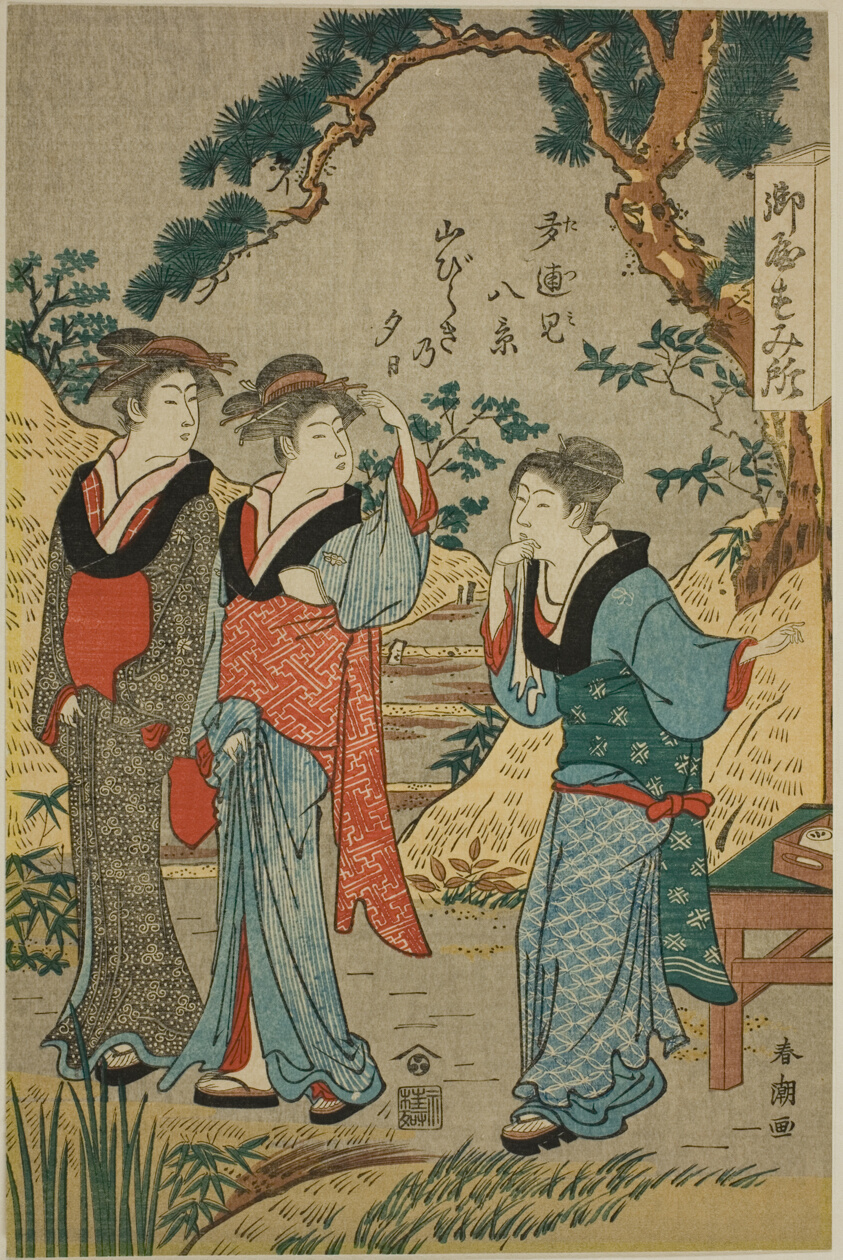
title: The First Evening in the Mountains (Yamabiraki no yûhi)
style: edo (japanese period), Japanism, East Asian, asian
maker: Katsukawa Shuncho; Japanese, active c. 1780-1801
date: Late 18th century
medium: Color woodblock print, ink and colors on paper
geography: Japan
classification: woodblock print; print; asian art